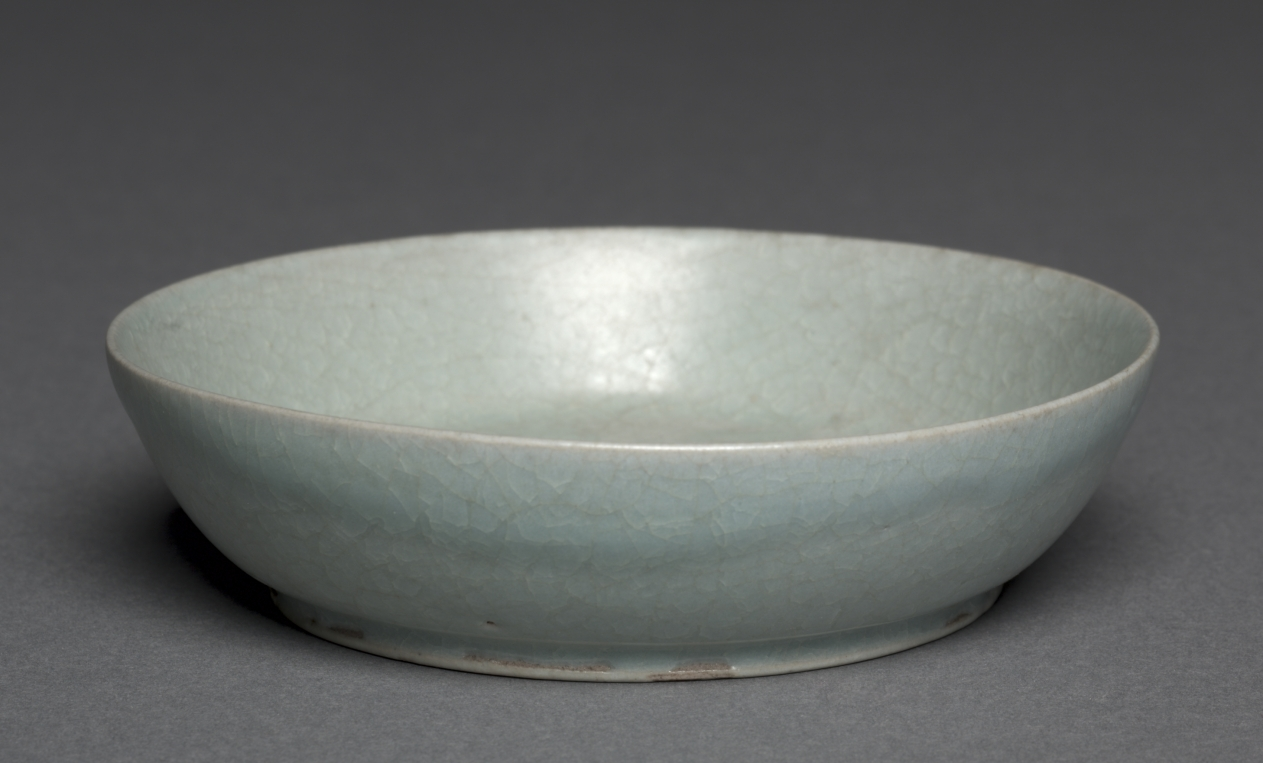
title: Brush Washer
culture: China, Henan Province, Baofeng, Qingliangsi, Northern Song dynasty (960-1127)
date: late 1000s–1127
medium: porcelaneous stoneware, Ru ware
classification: Ceramic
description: Ru ware is the rarest and most celebrated of all Chinese imperial wares. It was made for the late Northern Song court for a very short time and was therefore extremely rare and precious. Simplicity and refined elegance are Ru ware's hallmarks. Its graceful shape, soft luster, and subtle color variation of the glaze interact in perfect unity. Other physical characteristics include an ash-grey body, soft greyblue glaze with a fine crackle, as well as small sesame-seed spur marks on the base.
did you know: The little black spot in the glaze inside the dish is one of the slight imperfections characteristic of genuine Ru ware.